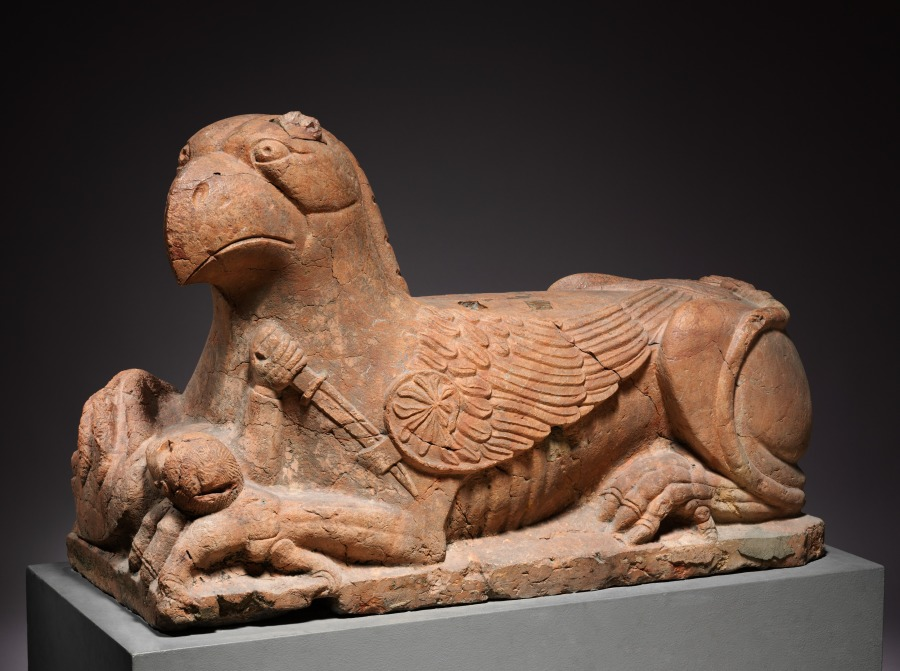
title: Guardian Griffin (pair)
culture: Northern Italy, Emilia, 12th century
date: 1150–1175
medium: pink limestone (called "Verona Marble")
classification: Sculpture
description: Griffins are fabled creatures that have the characteristics of an eagle and a lion—combining watchfulness and courage. In Christian art, the dual nature of the griffin was often used to signify that of Christ himself: divine (bird) and human (animal). Griffins were often used as guardian figures in church sculpture and were placed in portals and choir screens. The creatures seen here, with their inward-turning heads, were certainly used for such a purpose. When viewed from the front, one griffin may be seen clutching the figure of a knight between its paws, while the other griffin holds a calf. Their original function was probably to support the columns of a porch in front of a church doorway.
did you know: According to medieval bestiaries, griffins could tear a man to pieces and carry a whole bovine away, as seen here.